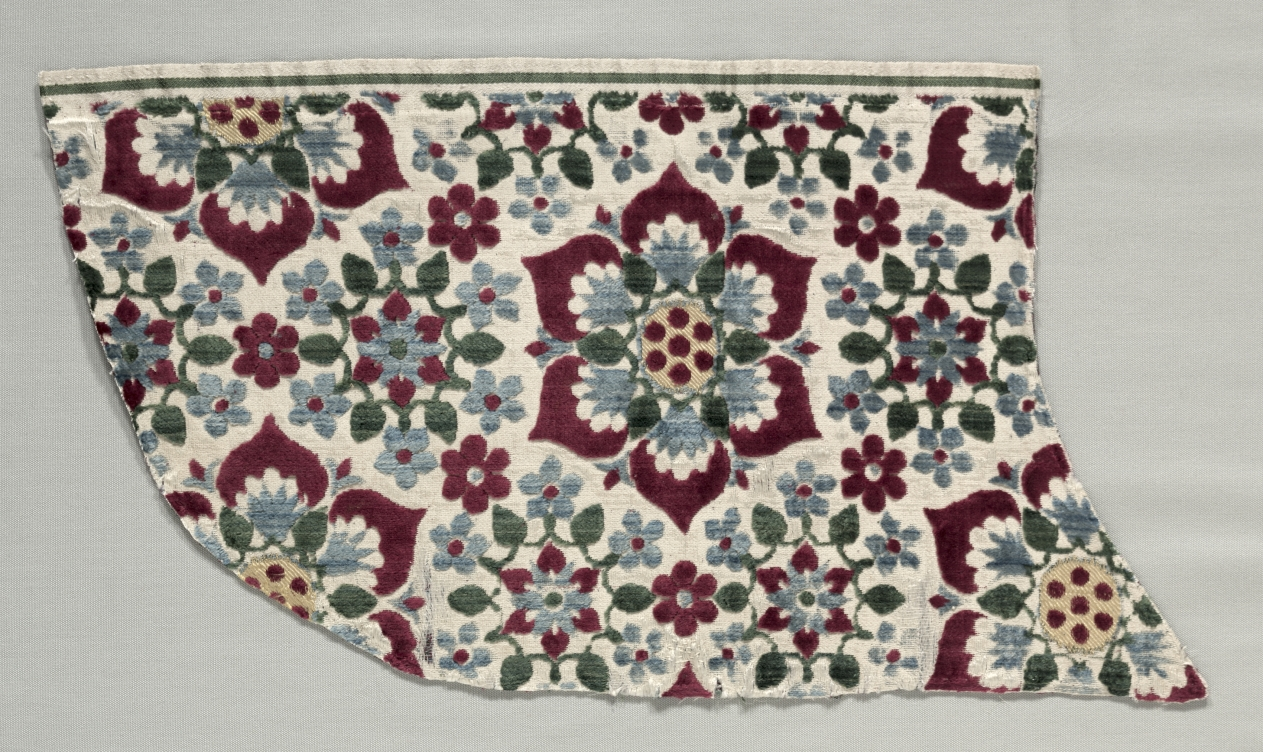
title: Velvet Fragment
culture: Italy, Padua and Venice, 16th century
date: 1400–1450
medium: velvet (cut, uncut, voided, brocaded); silk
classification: Velvet